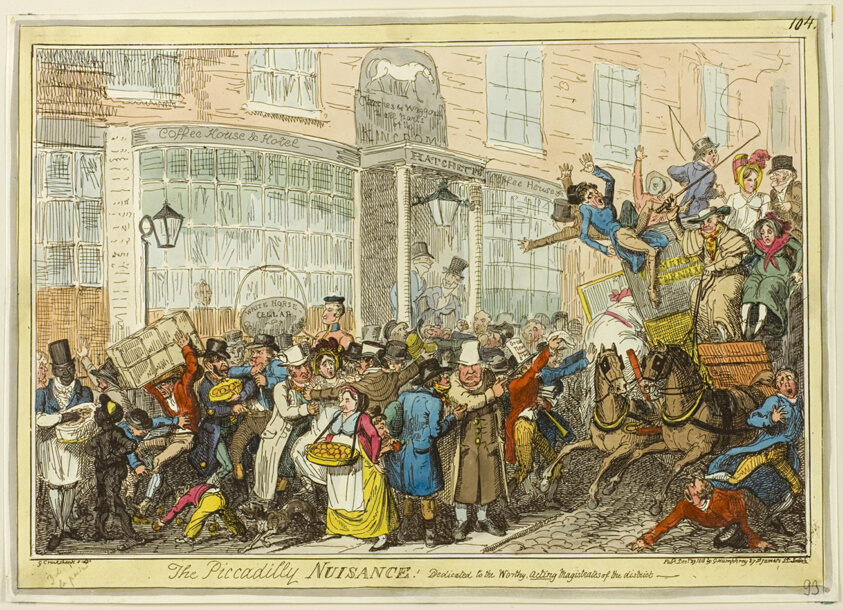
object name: Print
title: The Piccadilly Nuisance!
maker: George Cruikshank (English, 1792-1878); published by George Humphrey (English, c. 1773-1831)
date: published December 29, 1818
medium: Hand-colored etching on paper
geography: England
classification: etching; print; prints and drawing